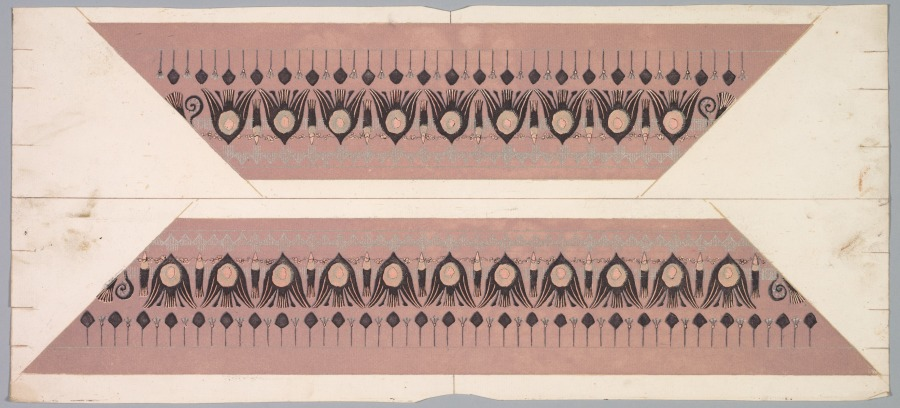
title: Embers Glow: Lotus Pattern Frame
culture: France, 19th century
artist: Theodore Roussel (French, 1847–1926)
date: 1890–1897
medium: color etching and aquatint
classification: Print